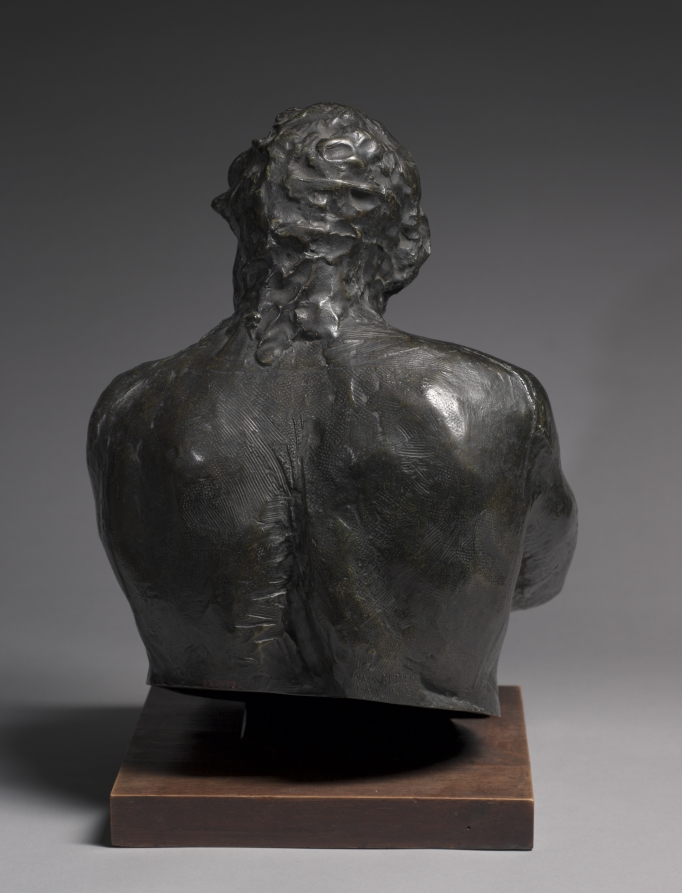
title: Study of Honoré de Balzac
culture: France, 19th century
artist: Auguste Rodin (French, 1840–1917)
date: 1891–1892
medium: bronze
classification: Sculpture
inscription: Signed on side, under left arm: "A. Rodin"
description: In 1891 Rodin was commissioned to create a monument honoring the celebrated French writer Honoré de Balzac. The figure evolved through multiple stages over a seven-year period as Rodin explored different methods of conveying the author’s genius and personality. This bust is a study for the first version, in which the full figure stands upright with legs apart, arms crossed over his corpulent belly. Rodin’s unglamorous portrayal of a national hero shocked the public accustomed to idealized figures in public monuments. The final design was even more intensely criticized because Rodin reduced the body to a powerful, abstract mass intended to convey the symbolic essence of the writer’s creative vitality.